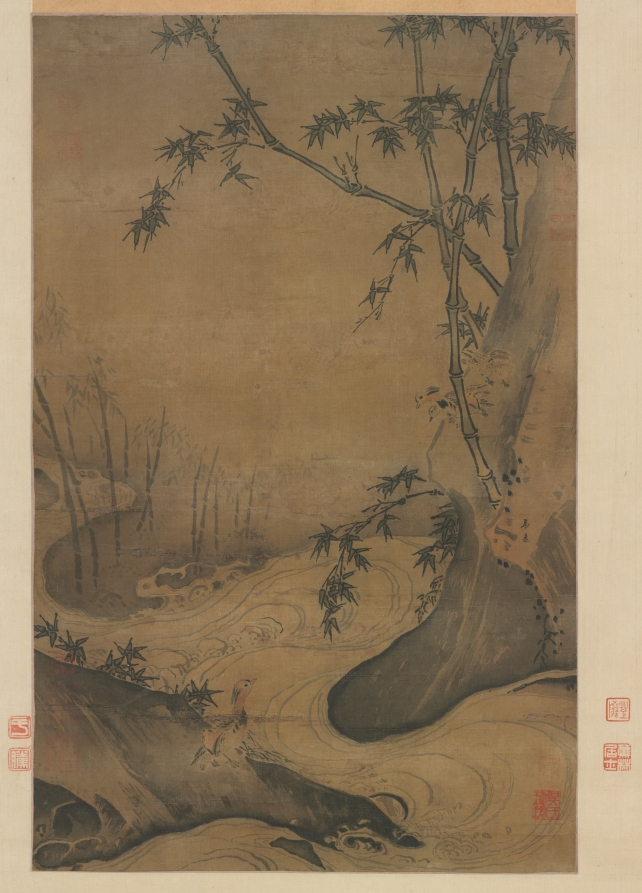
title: Bamboo and Ducks by a Rushing Stream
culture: China, Southern Song dynasty (1127–1279)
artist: Ma Yuan (Chinese, c. 1150–after 1255)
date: 1127–1279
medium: hanging scroll; ink and light color on silk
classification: Painting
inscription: 馬遠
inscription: 12 additional seals: 1 of An Kuo (1481–1534); 7 of Hsiang Yüan-pien (1525–1590); 2 of Liang Ch'ing-piao (1620–1691); 2 unidentified. (WKH)